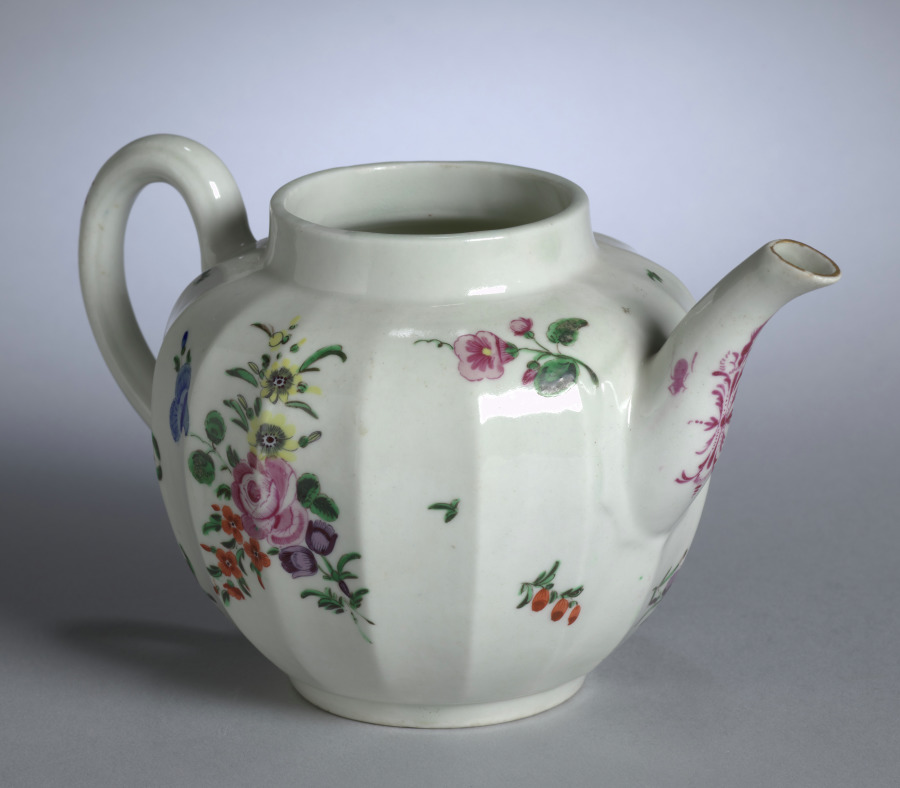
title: Teapot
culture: England, Worcester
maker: Worcester Porcelain Factory (British, established 1751)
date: c. 1755–75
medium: porcelain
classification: Ceramic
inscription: Mark on the bottom - An X with radiating lines inside a box.